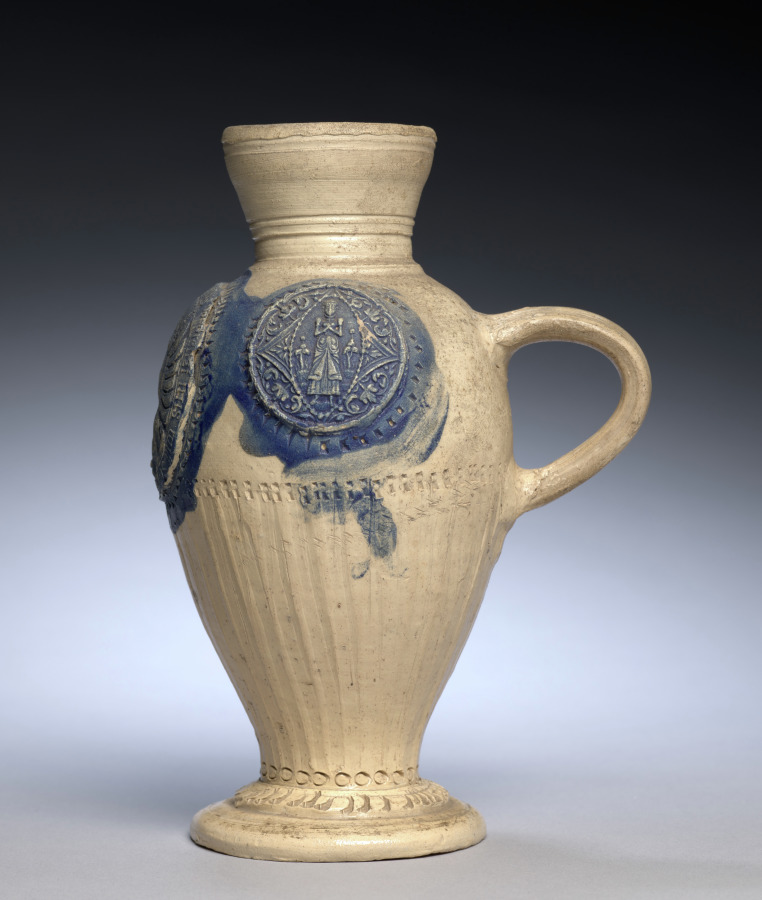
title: Light Tan Pitcher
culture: Germany, Rhenish, probably Sieberg, 19th century (?)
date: 1800s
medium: stoneware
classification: Ceramic